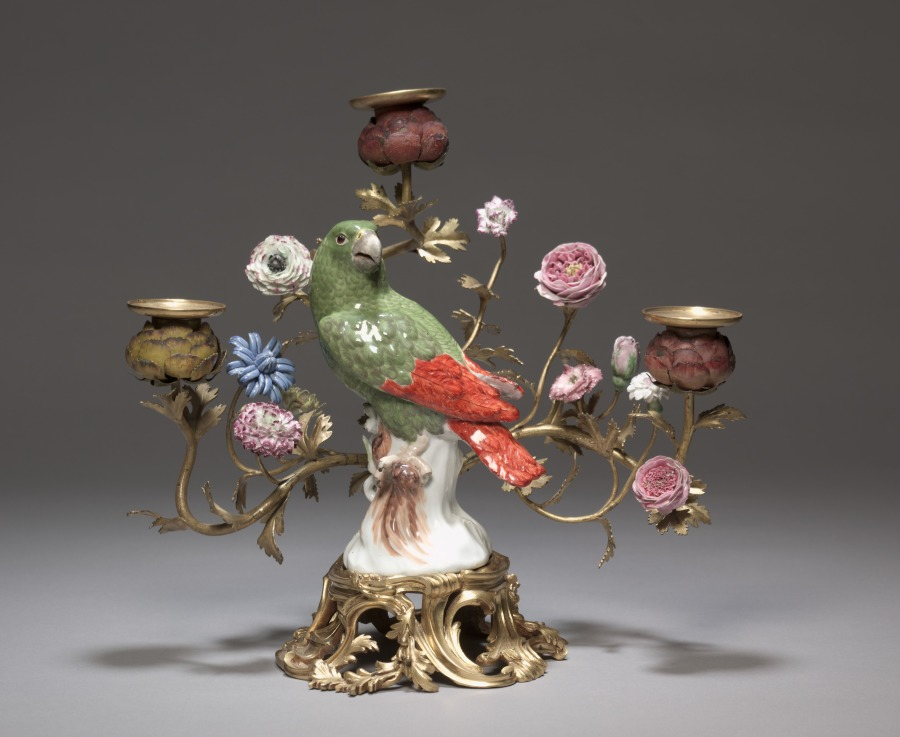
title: Candelabras with Parrots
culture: Germany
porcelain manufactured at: Meissen Porcelain Factory (German, est. c. 1710)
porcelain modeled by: Johann Joachim Kändler (German, 1706–1768)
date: c. 1740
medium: porcelain mounted in gilt bronze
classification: Ceramic